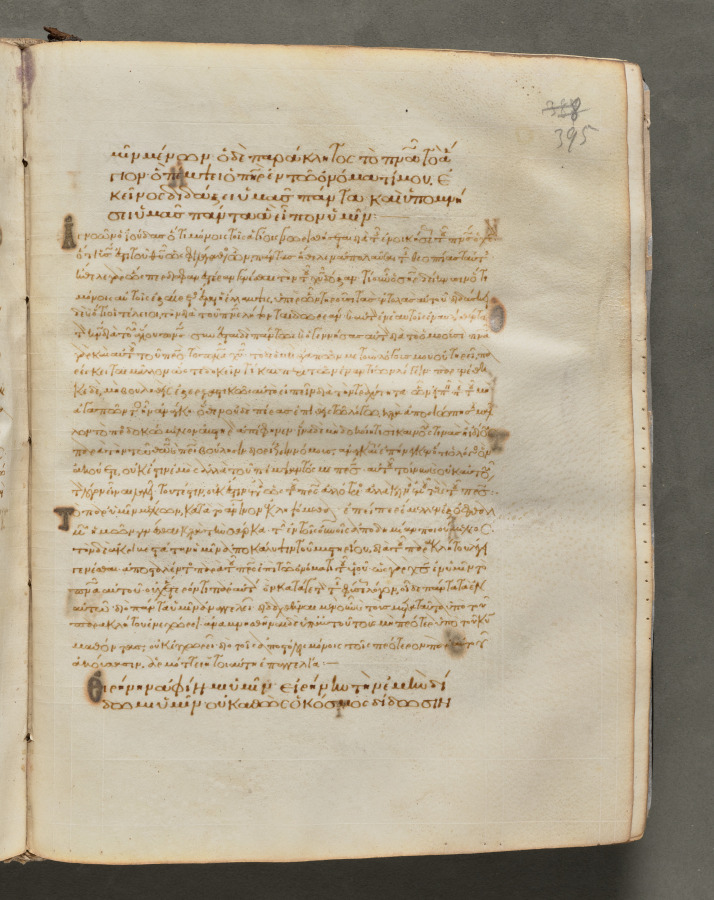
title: Text, folio 395 (recto), from a Gospel Book with Commentaries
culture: Byzantium, Constantinople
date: c. 1000–1100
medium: ink, tempera, and gold on vellum; leather binding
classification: Bound Volume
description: Each of the four gospels in this book opens on a page with brilliantly illuminated borders depicting the author of the text as well as birds—principally peacocks, symbols of the immortality of the soul—and fountains, representing the fountain of life and the salvation of the soul. This volume consists of 428 leaves with texts in Greek. Its level of sophistication suggests that it was probably written and decorated in a monastery in Constantinople.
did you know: Gospel books were carried in procession through Byzantine churches.